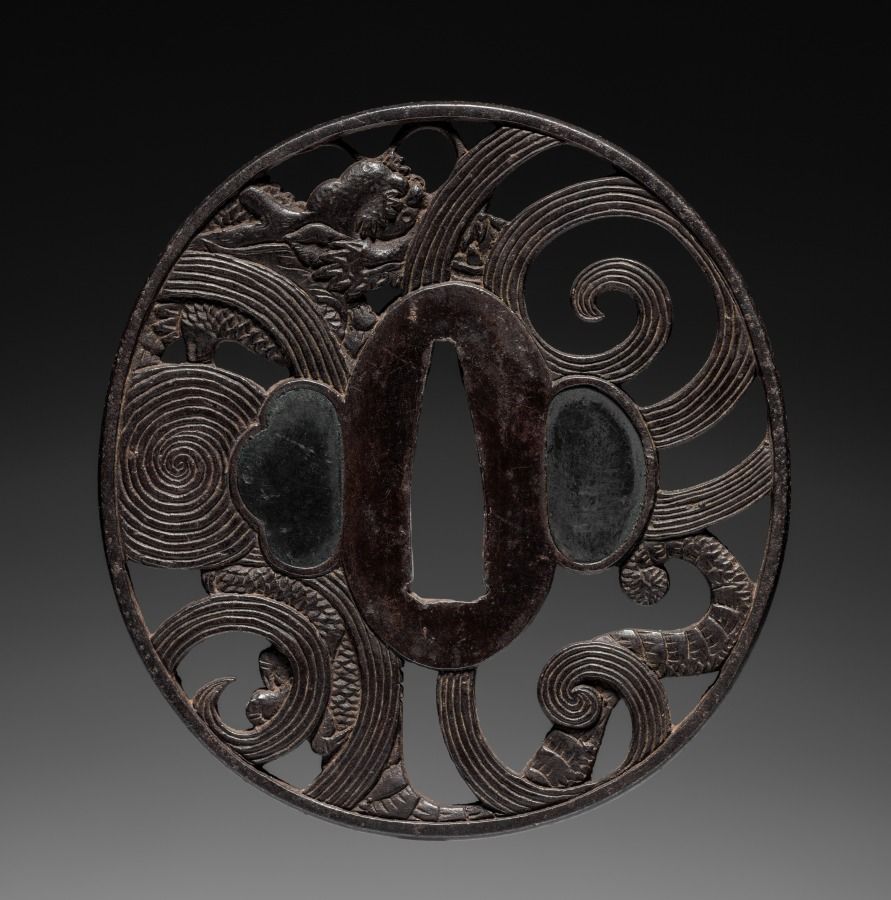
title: Sword Guard (Tsuba) with Dragon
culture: Japan, Edo period (1615–1868)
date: 1615–1868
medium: iron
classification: Arms and Armor